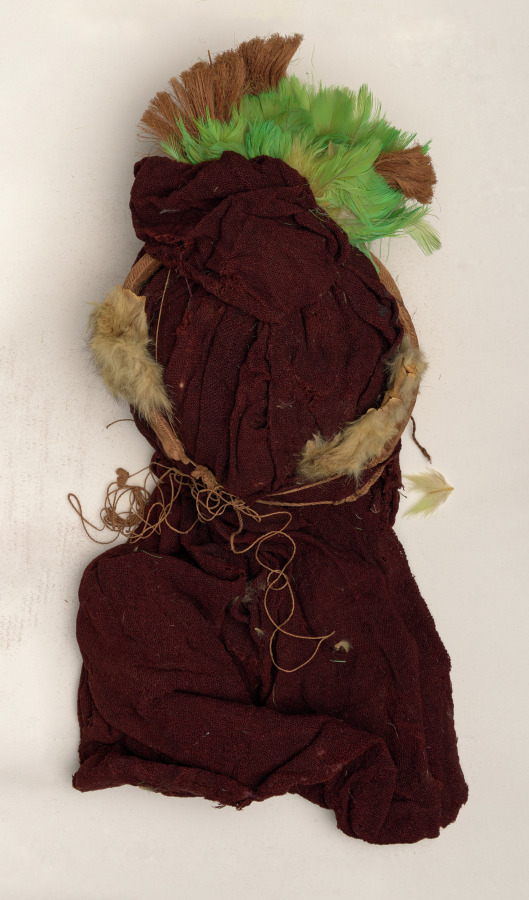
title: Mummy Bundle Turban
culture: Peru, South Coast, Paracas, 200 BC - AD 200, modern assembly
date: c. 650–100 BCE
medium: cotton, reed, wool, fur, feathers and other fibers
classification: Textile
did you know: While all the components appear to be original, they were assembled in modern times.